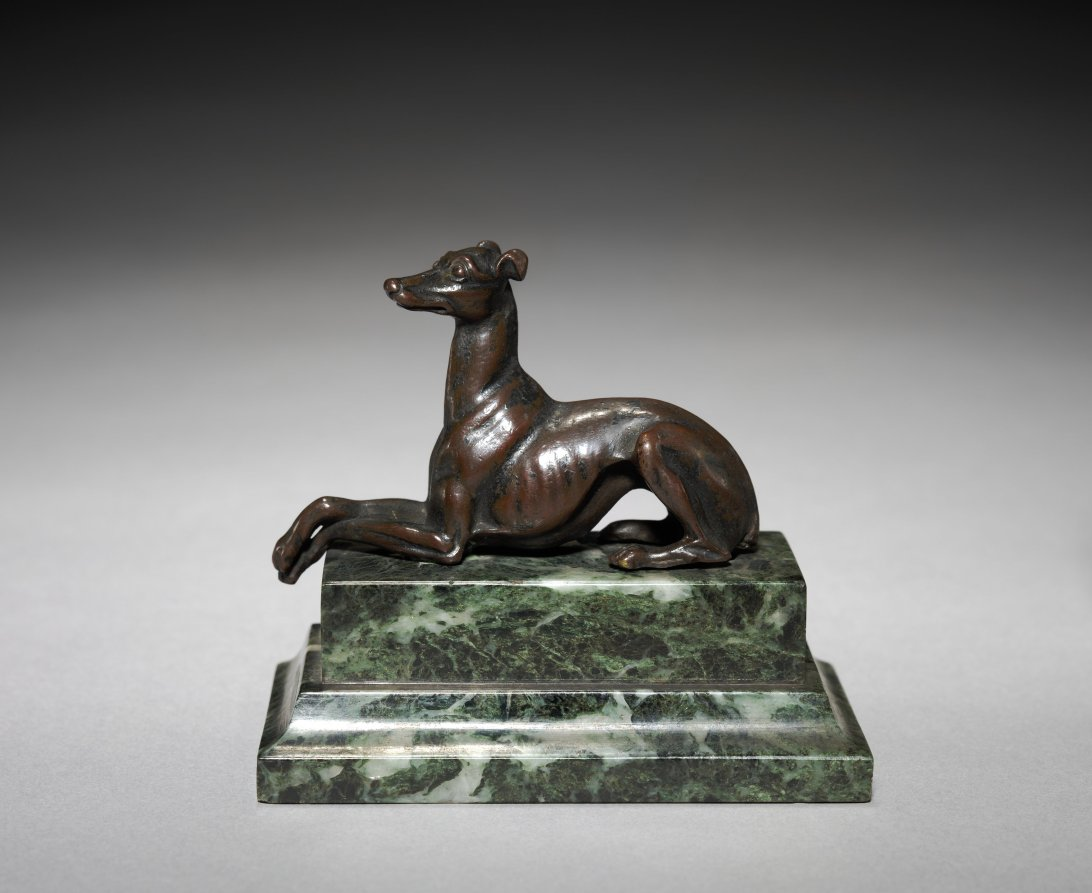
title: Whippet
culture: France, 19th century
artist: Pierre Jules Mène (French, 1810–1879)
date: c. 1825 – 1879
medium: bronze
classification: Sculpture